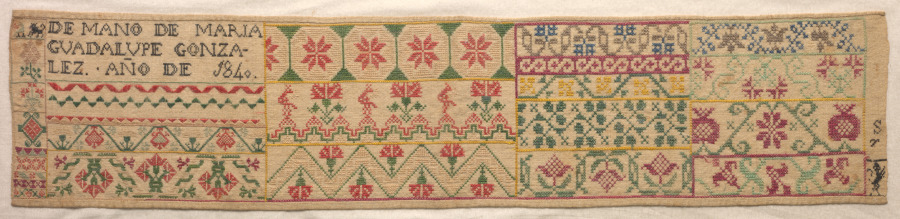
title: Sampler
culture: Mexico, 19th century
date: 1840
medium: embroidery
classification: Sampler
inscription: in upper left hand corner, "DE MANO DE MARIA/ GUADALUPE GONZA-/LEZ. ' AÑO DE 1840."